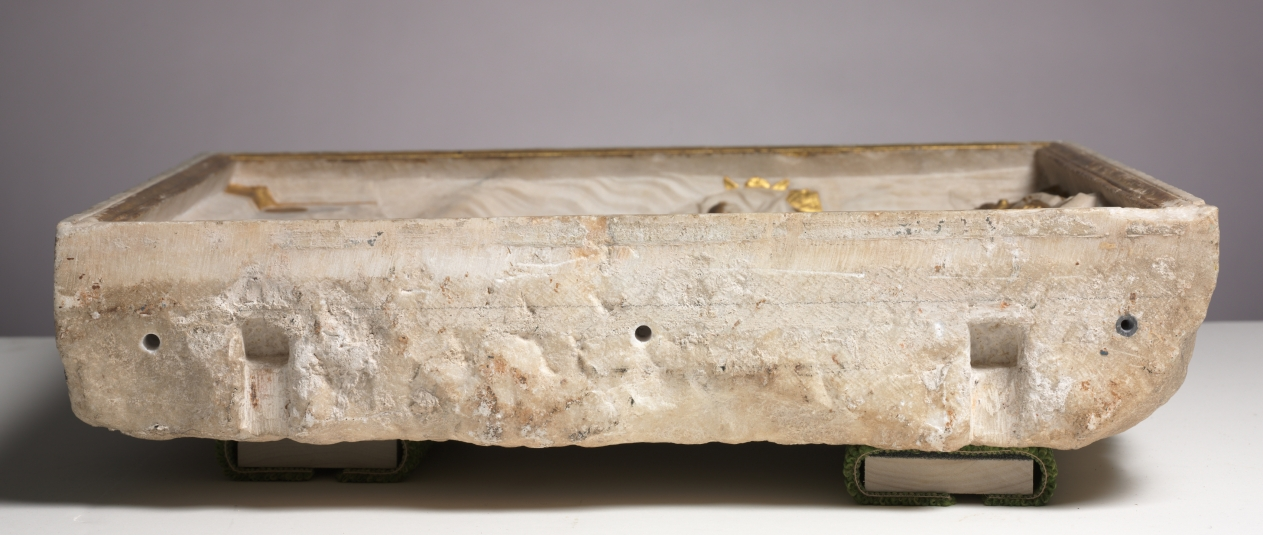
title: Pier Francesco Visconti, Court of Saliceto, Adoring the Christ Child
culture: Italy, Milan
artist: workshop of Benedetto Briosco (Italian, c. 1460–after 1514)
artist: and Tomaso Cazzaniga (Italian)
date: shortly after 1484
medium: marble with gilding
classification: Sculpture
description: This relief formed part of a public funerary monument in the church of Santa Maria del Carmine in Milan. The military leader and diplomat humbly kneels in profile before the infant Christ in a naturalistic setting, drawing attention to the Holy Family’s humanity and the deceased man’s reverence.